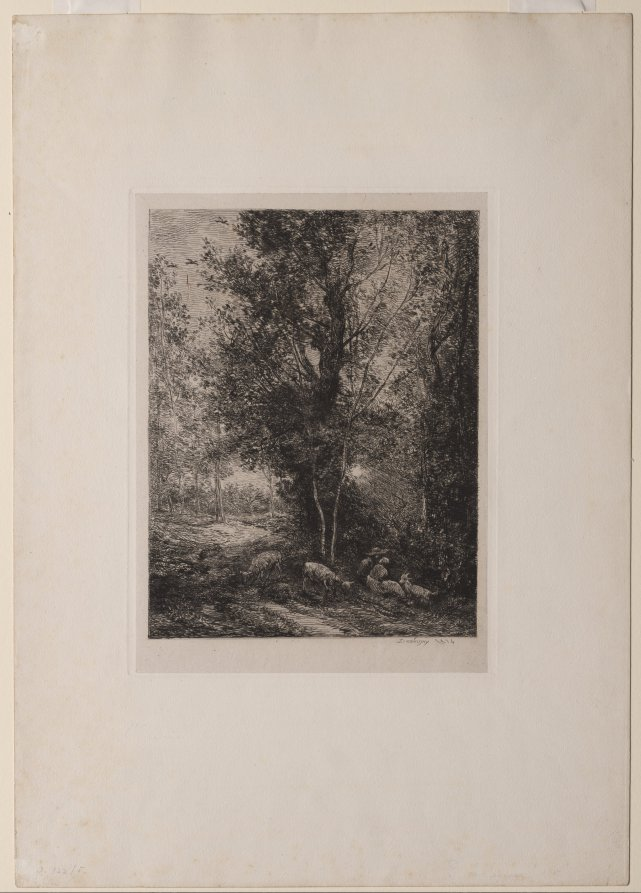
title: The Shepherd and Shepherdess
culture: France, 19th century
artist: Charles François Daubigny (French, 1817–1878)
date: 1874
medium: etching on chine collé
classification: Print